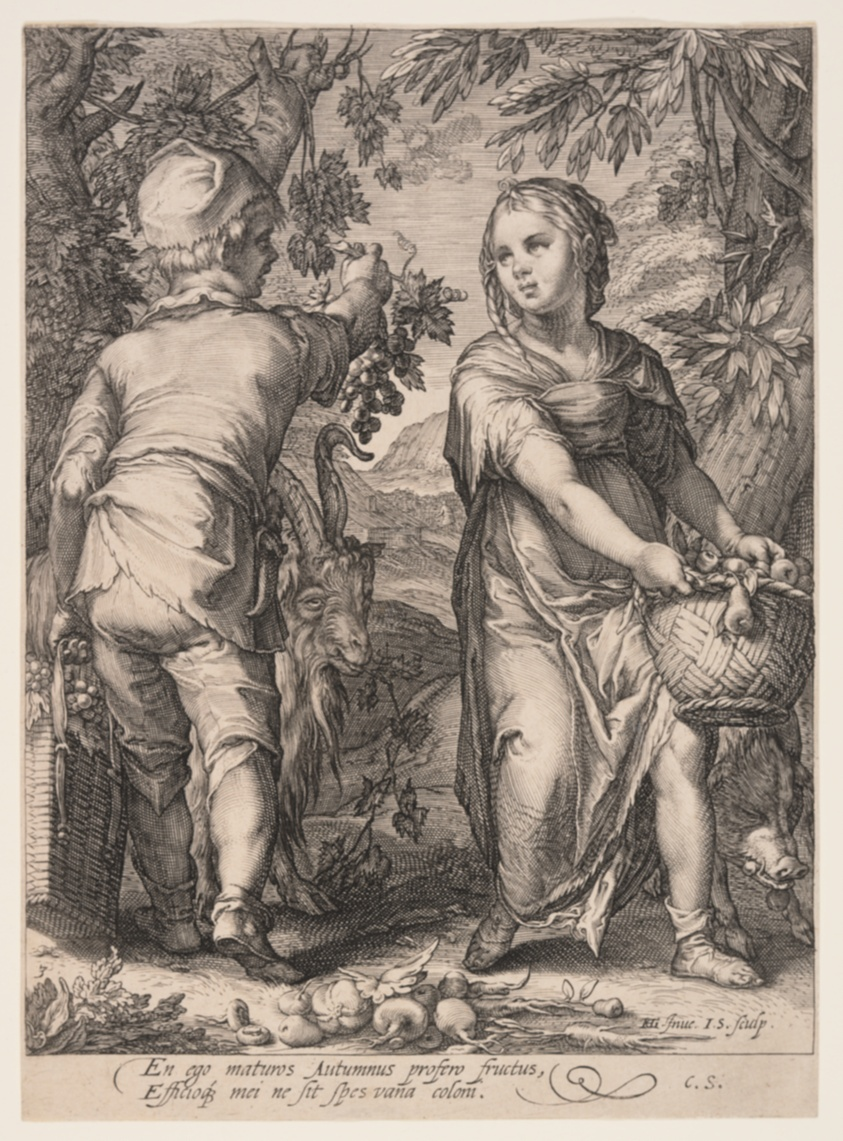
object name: Print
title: Autumn (Boy and Girl Harvesting Fruit), from The Four Seasons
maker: Jan Saenredam (Dutch, 1565–1607); after Hendrick Goltzius (Dutch, 1558–1617)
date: 1601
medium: Engraving on laid paper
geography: Netherlands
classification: print; engraving; paper; prints and drawing